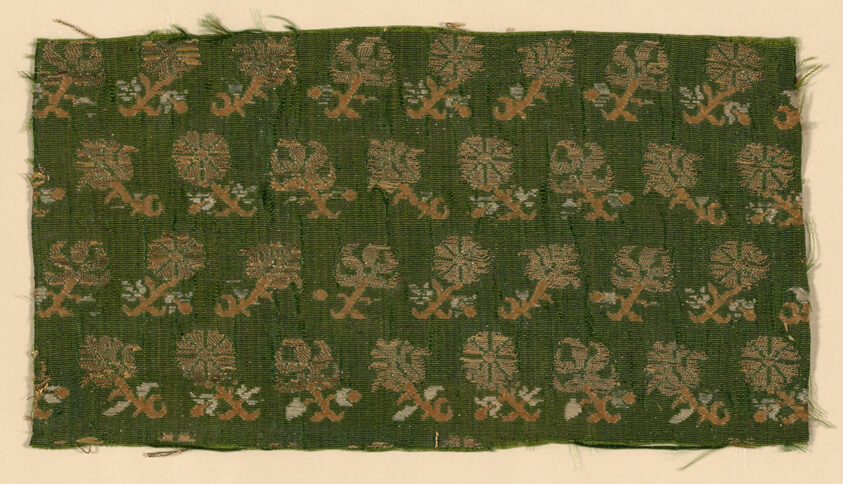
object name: Textile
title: Fragment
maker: Italy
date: 1625/75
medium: brocaded plain compound cloth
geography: Italy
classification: textile; weaving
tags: flowers